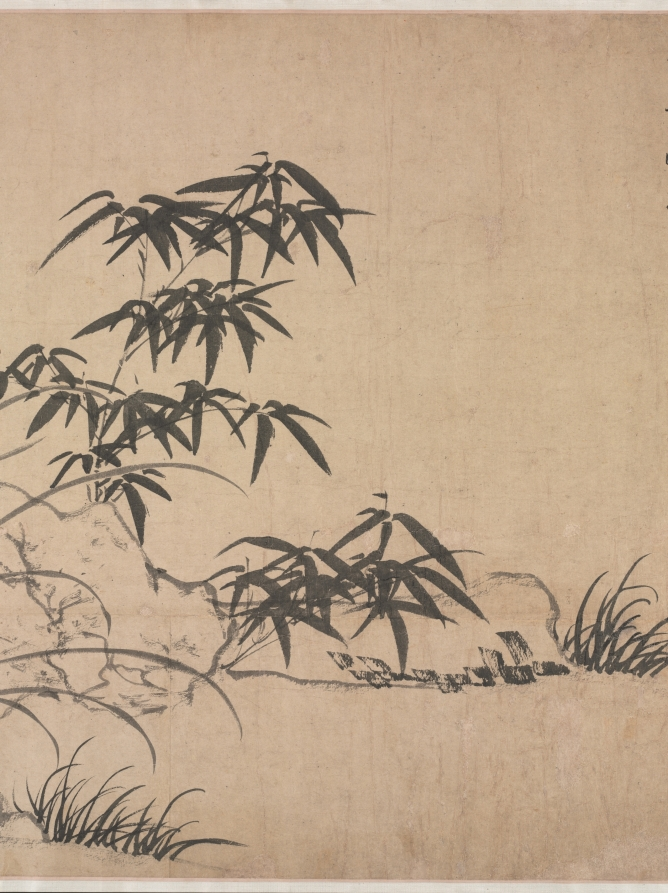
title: Bamboo, Rocks and Lonely Orchids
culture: China, Yuan dynasty (1271-1368)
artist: Zhao Mengfu (Chinese, 1254–1322)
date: 1271–1368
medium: Handscroll; ink on paper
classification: Painting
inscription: 竹石幽蘭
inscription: 孟頫為善夫寫. [印] 趙氏子昂; [印] 松雪齋; [印] 天水郡圖書印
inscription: 古人善書者必能畫點墨作蠅，便自有生意。松雪翁蘭石草聖飛帛筆法皆具，可寶也。安陽韓性 [印]明善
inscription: Colophon 2. Qiu Yuan 仇遠 (1247-after 1328), a respected poet during the Song and Yuan periods. He was linked to, among others, Zhao Mengfu and Gao Kegong. Zhao Mengfu painted a version of Nine Songs 九歌圖 for him, and Gao Kegong dedicated to him a painting titled Mountain Village 山村圖 (current whereabouts unknown). His poem here is also preserved in his collected works.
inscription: Colophon 3. Zheng Yuanyou 鄭元祐 (1292-1364), an erudite scholar and teacher of renown, active in Hangzhou and Suzhou. In the 1350s, when Gu Ying’s literary gatherings were at their peak, he was already elderly and participated in a limited way.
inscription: Colophon 4. Wu Kegong 吳克恭 (active mid-1300s), a friend of Gu Ying and Ni Zan 倪瓚 (1301–1374), a major Yuan painter.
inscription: Colophon 5. Angji 昻吉 (jinshi of 1348), of Western Xia 西夏 origin and a poet of distinction. He wrote an introduction to the painting Literary Gathering at Yushan 玉山雅集圖, of which Zhang Wo was the painter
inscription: Sheet 2. Yuan: friends of Gu Ying Colophon 6. Wang Zifang 王孜方 (active mid-1300s), an official who, at the time of his visits to Gu Ying’s estate, had reached the rank of Minister. He is better known under the name Wang Keju 王可矩.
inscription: Colophon 7. Ke Jiusi 柯九思 (1290–1343), a major official who served in the Kuizhang Pavilion 奎章閣 and as an advisor to Emperor Wenzong in matters of calligraphy and painting.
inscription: Colophon 8. Yu Li 于立 (active mid-1300s), a Daoist recluse, poet, and close friend of Gu Ying, so much so that during his visit to Gu Ying’s estate he was given accommodation in a special pavilion. His poem here is also preserved in Gu Ying’s Cao tang ya ji.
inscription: 至正十一年十月廿八日男奕百拜堇觀 [印] 趙奕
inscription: Colophon 10. Yu Ji 虞集 (1272-1398), a major official and literary figure who also served in the Kuizhang Ge. His poem is recorded in his collected works. The poem is one of a set of four inscribed at the request of Wang Huayu 汪華玉 on Orchids and Rock 蘭石圖 by Zhao Mengfu, obviously a different, long lost, painting. Wang Huayu was an official and a collector (jinshi of 1327). Yu Ji’s colophon here was written before 1348 and during his retirement in Linchuan 臨川, Jiangxi, possibly sent from there. It is possible he had not seen the painting, and his calligraphy here appears to be rather casual and detached, jotting down an old poem without much care, contrary to his earlier practice.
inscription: Colophon 11. Sun Shi 孫時 (mid-1300s–early 1400s), a native of Yuncheng 鄆城, Shandong, and a jinshi of 1390. He may have been quite young when paying a visit to the Yushan gatherings in the late 1340s and early 1350s.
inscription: Colophon 12. Zhang Zhu 張翥 (1287–1368), Qiu Yuan’s disciple and a poet of renown, who enjoyed a belated career in officialdom and was known for his integrity.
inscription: Sheet 4. Yuan and Ming: further friends of Gu Ying; colophon 17 begins the early Ming sequence. Colophon 13. Zhang Wo 張渥 (active c. 1336-after 1364), a frustrated scholar, a poet, and a painter of landscape and figures. An active participant in Gu Ying’s literary circle, he painted the Literary Gathering at Yushan, a pictorial document of the individuals and activities on Gu Ying’s estate. His rendering of Nine Songs is well known, and one version is in the collection of the Cleveland Museum of Art (see 1959.138). His poem here is also found in Gu Ying’s Cao tang ya ji, under the entry “ti Zhao Hanlin mo lan 題趙翰林墨蘭” (inscribed on the Ink Orchid by Zhao the Hanlin academician). This is a rare instance of calligraphy as well as signature by the artist.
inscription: 觀吳興公竹石幽蘭圖使人鄙吝頓消。其筆勢從橫天真爛澷，一出於二王書法。冝仲瑛寳而玩之異於常品也。至正八年十月天台陳基書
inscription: Colophon 15. Zhang Shen 張紳 (active about 1340–after 1385), a respected calligrapher and participant in Gu Ying’s literary gathering. He resided in Kunshan, the same city where Gu Ying’s estate lies. In the third line of the poem, he mentioned Gu Ying’s hao, “Jinsu 金粟.” This was a name he assumed later in life, after the death of his mother in the year 1356. Thus this inscription must have been written after that date.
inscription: Colophon 16. Wang Sun 汪遜 (active mid-14th century), a little-known native of Kuaiji 會稽, who may have been one of the infrequent visitors to Gu Ying’s estate.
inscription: Colophon 17. Hu Guang 胡廣 (1370-1418) is the first Ming colophon writer on this scroll. He was an official of great power in the court and a trusted advisor of Emperor Chengzu; he served as the Grand Academician of the Hall of Literary Profundity 文淵閣大學士 and Grand Academician of the Left Secretariat of the Heir-Apparent 左春坊大學士.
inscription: Sheet 5. Early Ming Colophon 18. Wang Yinshi 王尹實 (active about 1403–about 1424), a native of Siming 四明, Zhejiang, and a minor official and calligrapher.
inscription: Colophon 19. Zhang Yuchu (signed here as “Wuwei 無 為”), the forty-third Heavenly Master of the Zhengyi sect of Daoism. A man of erudition, he was also a poet, painter, and calligrapher. A modified version of the poem here was published in his collected works titled Xian quan ji 峴泉集. A slight modification in the first line is the only change: “Wu xing miao yao nian bing xue zi 吳興玅年氷雪姿.”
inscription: Colophon 20. Yao Guangxiao 姚廣孝 (1335-1418), a Buddhist monk, scholar, and counselor to Chengzu in his successful attempt at usurpation of the throne. Yao Guangxiao was a controversial figure but wielded enormous power.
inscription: Sheet 6. Wang Ning alone Colophon 21. Wang Ning 王寧 (d. 1411) signed as “Qingzhen 清真” in this colophon. One of the three seals reveals his identity as the Yongchun Hou 永春侯 [Marquis of Lasting Spring] (appointed 1402), and the husband of Princess Huaiqing 懷慶公主 (1328-1398), the sixth daughter of the founder of the Ming dynasty, Zhu Yuanzhang. This colophon postdates 1402.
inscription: Sheet 7. Mid-Ming Colophon 22. Ou Yi’an 區易安 (active first half of 15th century), unknown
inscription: Colophon 23. Chen Lian 陳璉 (1370-1454), a native of Dongguan 東莞, Guangdong 廣東, and an official admired for his erudition and perspicacity. In view to the known calligraphic style of Chen Lian, this colophon appears to be a transcription and not written by him.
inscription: Colophon 24. Wei Ji 魏驥 (1374-1471) enjoyed longevity (he lived to the age of ninety-eight) and an extended length of service as an official. A jinshi of 1406, he eventually became the Minister of Personnel in Nanjing 南京吏部尚書. The colophon here is dated 1434, when he was invited to view the painting by the Court Musician Mo Zhizhong 莫至翀, its owner. Again, in view of its calligraphic style, this was not written by him, but is a transcription from the original.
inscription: Colophon 25: Zhang Yi 章鎰 (active 1462-1473), a Ningbo native and an official with a reputation for courage and integrity.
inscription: Sheet 8. Further mid-Ming Colophon 26. Yin Zhi 尹直 (1427-1511), a controversial figure in Ming politics in spite of his erudition and high position as the Minister of War 兵部尚書.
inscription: Colophon 27. Zou Yu 鄒虞 (active 1460-1520; jinshi of 1490), a native of Hangzhou. In 1510, he was appointed Administrative Vice Commissioner in Guangdong.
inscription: Sheet 9. Xu Shouhe 徐守和 alone Colophon 28. Xu Shouhe 徐守和 dated his entry in 1629. Since he wrote it in his own studio, The Lesser Qingbi Pavilion 小清閟, he was likely the owner of the scroll. Xu’s life is not well documented; he was a connoisseur of note during the last years of the Ming dynasty rule. He may have acquired the Cleveland scroll from Wu Ting, whose seals appear here.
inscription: Sheet 10. The mounter’s note. Xu Shudong 徐曙東 of Jiaxing 嘉興 made the remounting on the first day of sixth month, 1802.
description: Bamboo and orchids are motifs associated with the virtues of the scholar-official. Bamboo that bends but does not break stands for moral integrity, endurance, and loyalty. Wild, fragrant orchids that bloom in the shadow symbolize modesty and the aura of learnedness. Rocks are often considered to be miniature versions of mountains that form the universe. This monochrome ink painting is brushed on paper in a masterfully calligraphic manner. While the rocks are delineated in chalky, dry strokes showing the effect of flying white (feibai), the bamboo and orchids are drawn with a swift brush demonstrating the virtuosity of the artist.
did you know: One of the many inscriptions records that the handscroll was last remounted by Xu Shudong 徐曙東 of Jiaxing 嘉興 in 1802.